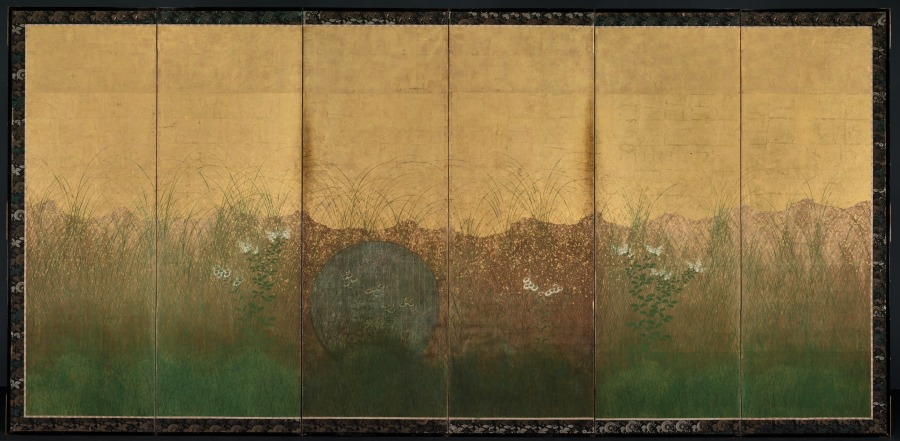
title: Autumn Evening with Full Moon on Musashino Plain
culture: Japan, Edo period (1615–1868)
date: early 1600s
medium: One of a pair of six-fold screens; ink, color, and gold and silver foil on gilded paper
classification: Painting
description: Tall grasses and autumn flowers reach out of thick green undergrowth in this depiction of the plain of Musashi, a site famous from classical Japanese poetry. A silver disc, now tarnished, represents the full moon. Flecks of cut-gold foil in the sky evoke the day’s passage into night. Once a wilderness with a vast horizon, Musashi is now densely populated.